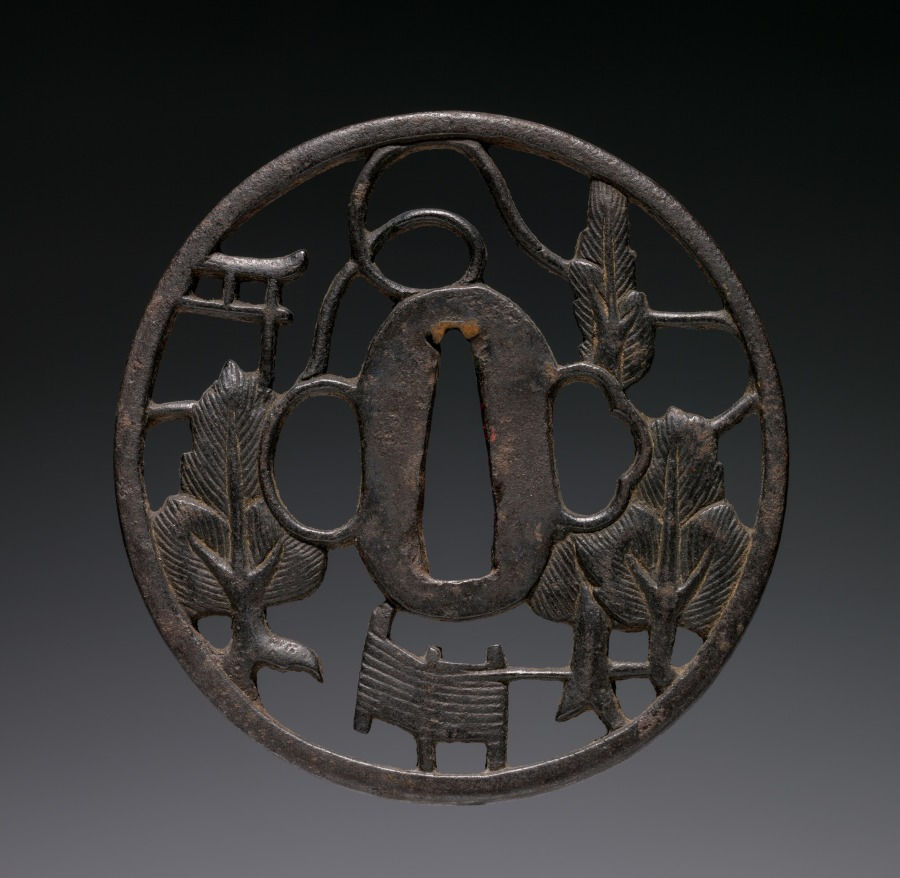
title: Sword Guard (Tsuba)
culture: Japan, possibly Edo period (1615-1868)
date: c. 1615–1868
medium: iron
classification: Arms and Armor